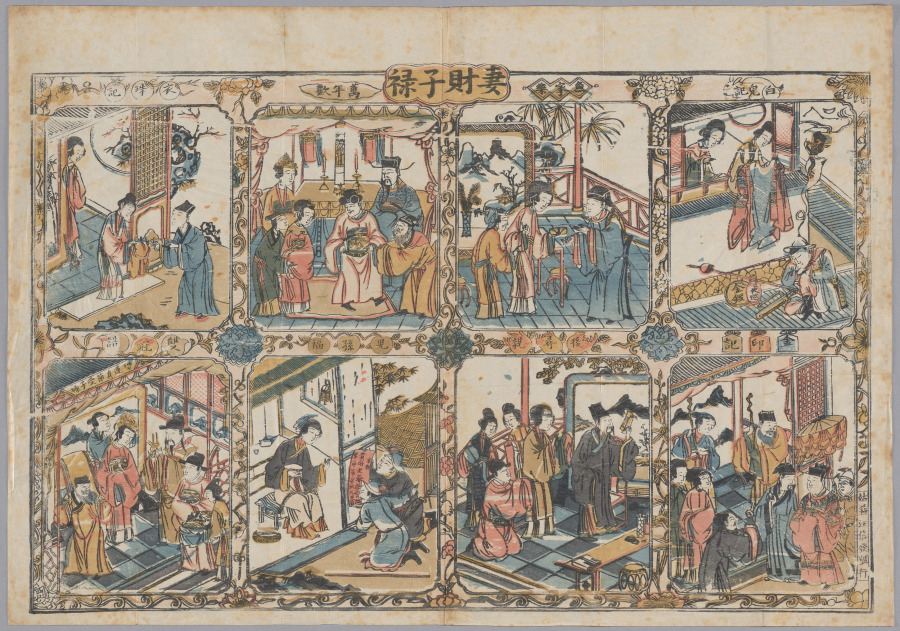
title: Wife, Wealth, Sons, and a Salary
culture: China, Qing dynasty (1644–1911), Kangxi reign (1622–1722)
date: 1662–1722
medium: Polychrome woodblock print; ink and color on paper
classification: Print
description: In the 1600s, printing flourished in such Jiangnan cities as Nanjing, Suzhou, Hangzhou, and Huizhou, evolving from privately enjoyed illustrated books printed in color to more commercialized single-sheet color prints that were hung on walls and became part of the rich urban visual culture.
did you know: Woodblock printing in color reached a height in China in the 1600s to 1700s. The prints were executed by means of sets of separate blocks, each carved to print a different color.